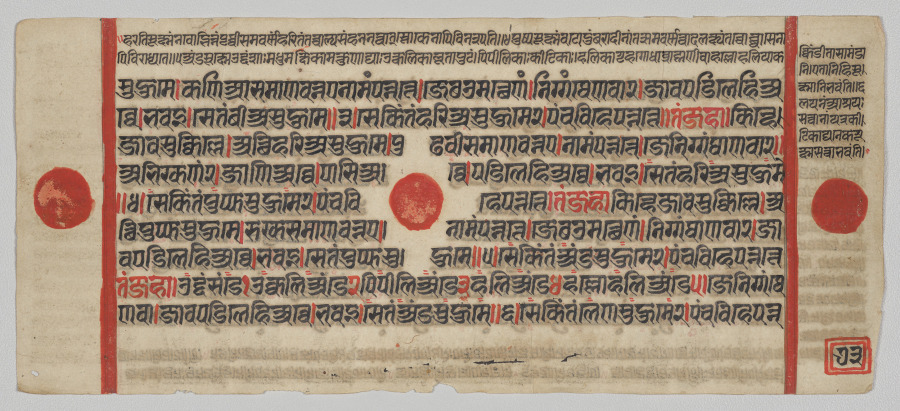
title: Text, Folio 73 (verso), from a Kalpa-sutra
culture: Western India, Gujarat, last quarter of the 15th century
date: c. 1475–1500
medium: Gum tempera, ink, and gold on paper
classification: Painting